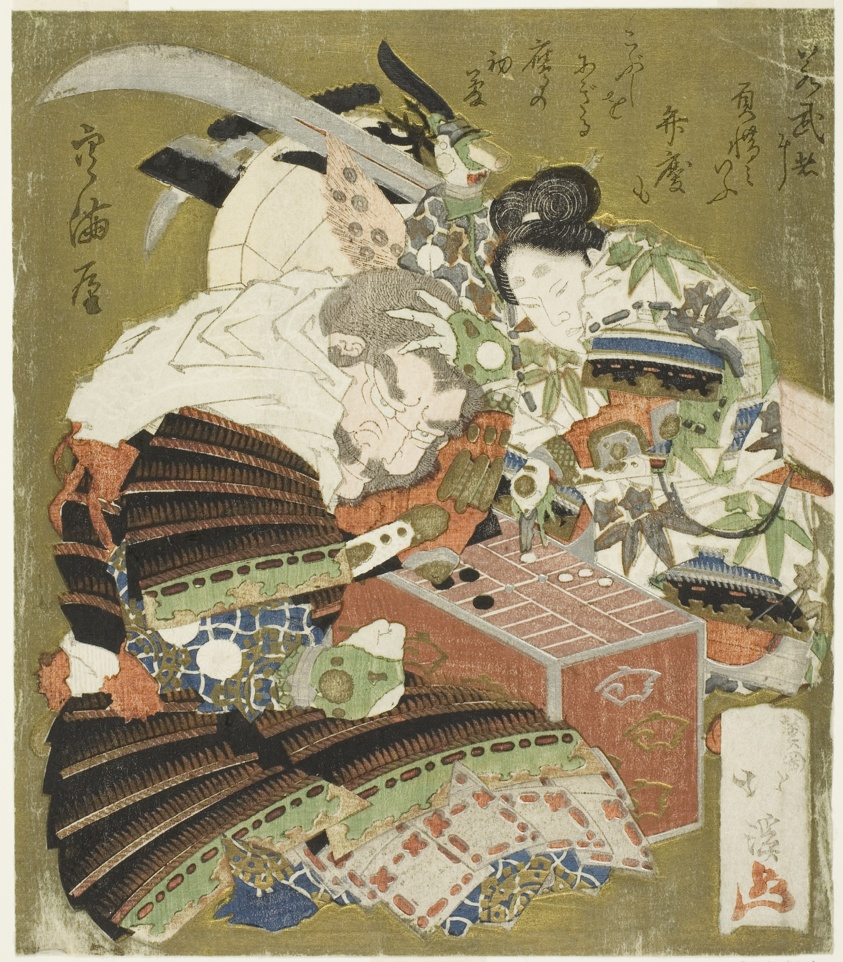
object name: Print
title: Ushiwakamaru (Minamoto no Yoshitsune) defeats Benkei in a game of sugoroku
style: Japanese (culture or style)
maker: Totoya Hokkei (Japanese, 1780-1850)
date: c. 1825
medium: Color woodblock print; shikishiban, surimono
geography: Japan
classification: woodblock print; print; asian art